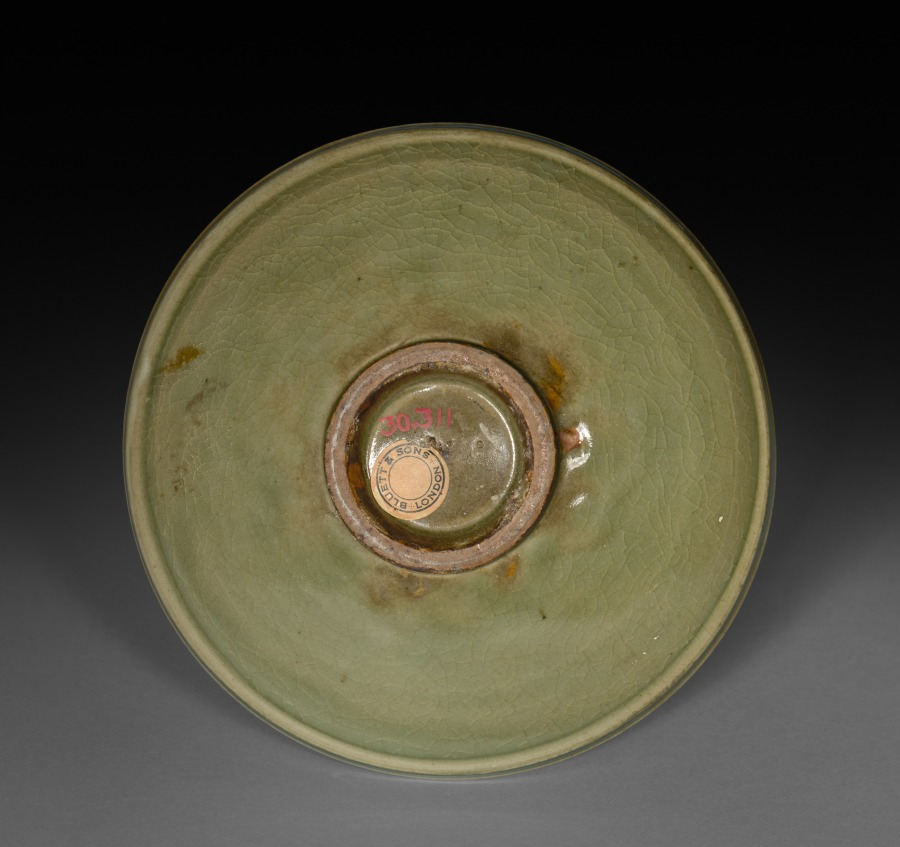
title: Saucer: Northern Celadon Ware, Yaozhou type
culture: China, late Northern Song dynasty (960-1127) - Jin dynasty (1115-1234)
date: 1100s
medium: glazed stoneware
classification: Ceramic